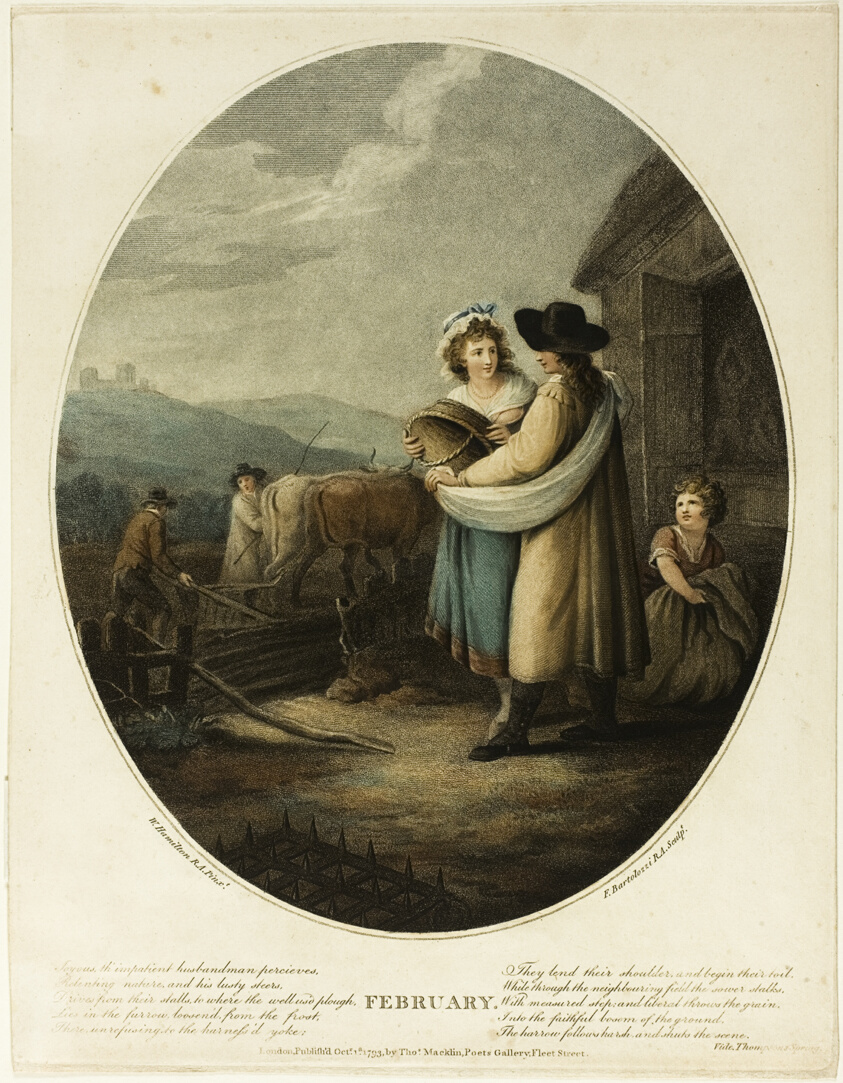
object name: Print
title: February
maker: Francesco Bartolozzi (Italian, 1727-1815); after William Hamilton (English, 1751-1801); published by John and Josiah Boydell (English, 18th century)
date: October 1, 1793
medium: Color stipple engraving on paper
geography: Italy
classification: engraving; print; prints and drawing